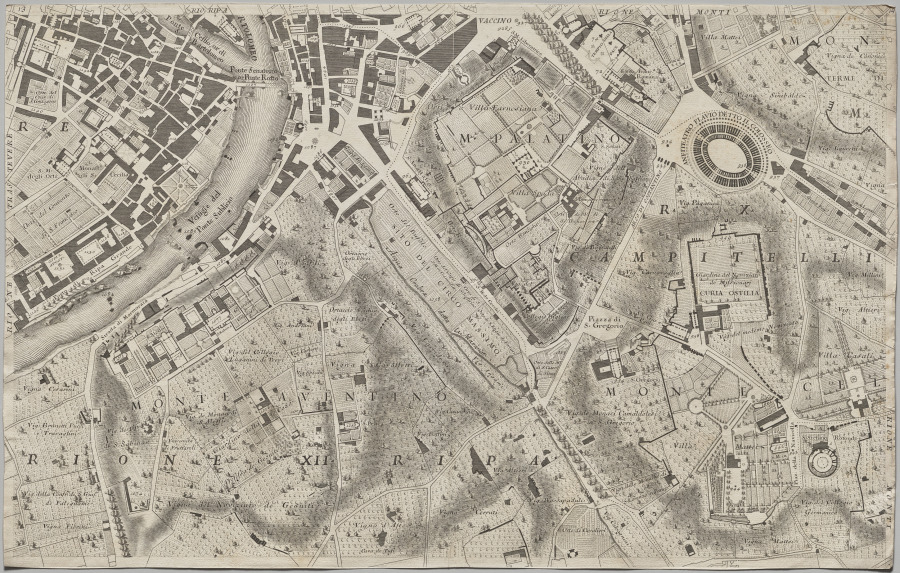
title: Nuova pianta di Roma data in luce da Giambattista Nolli l’anno MDCCXLVII, known as La Pianta Grande di Roma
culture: Italy, 18th century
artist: Giovanni Battista Nolli (Italian, 1701–1756)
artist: Carlo Nolli (Italian, 1690–1790)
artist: Rocco Pozzi (Italian, 1701–1774)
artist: Pietro Campana de Soriano (Italian, 1725–c. 1779)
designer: Stefano Pozzi (Italian, 1699–1768)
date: 1748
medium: etching and engraving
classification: Print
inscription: Written in pencil on verso: "[illegible]"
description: The monumental Pianta Grande di Roma, or Large Plan of Rome, which measures about 5 x 7 feet when its twelve plates are assembled, is a landmark in both cartography and printmaking. The map is considered the first scientific rendering of Rome, establishing new standards of accuracy and thoroughness when it was published in 1748. Devised by the Lombard architect and surveyor Giovanni Battista Nolli (Italian, 1701-56), the creation of the map required over ten years of surveying the city carried out by Nolli and a team of assistants with the help of new measuring devices. In Nolli’s “ichnographic” (also called “ground”) plan, architectural features and the urban infrastructure are reduced to a single horizontal slice, a minutely detailed footprint that conveys dimensions, proportions, and orientations to scale with the utmost clarity.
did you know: To make this map, Pope Clement XII granted the mapmaker permission to measure courtyards and other interior, inaccessible spaces in monastic communities, even those in nuns’ convents, which was controversial at the time.